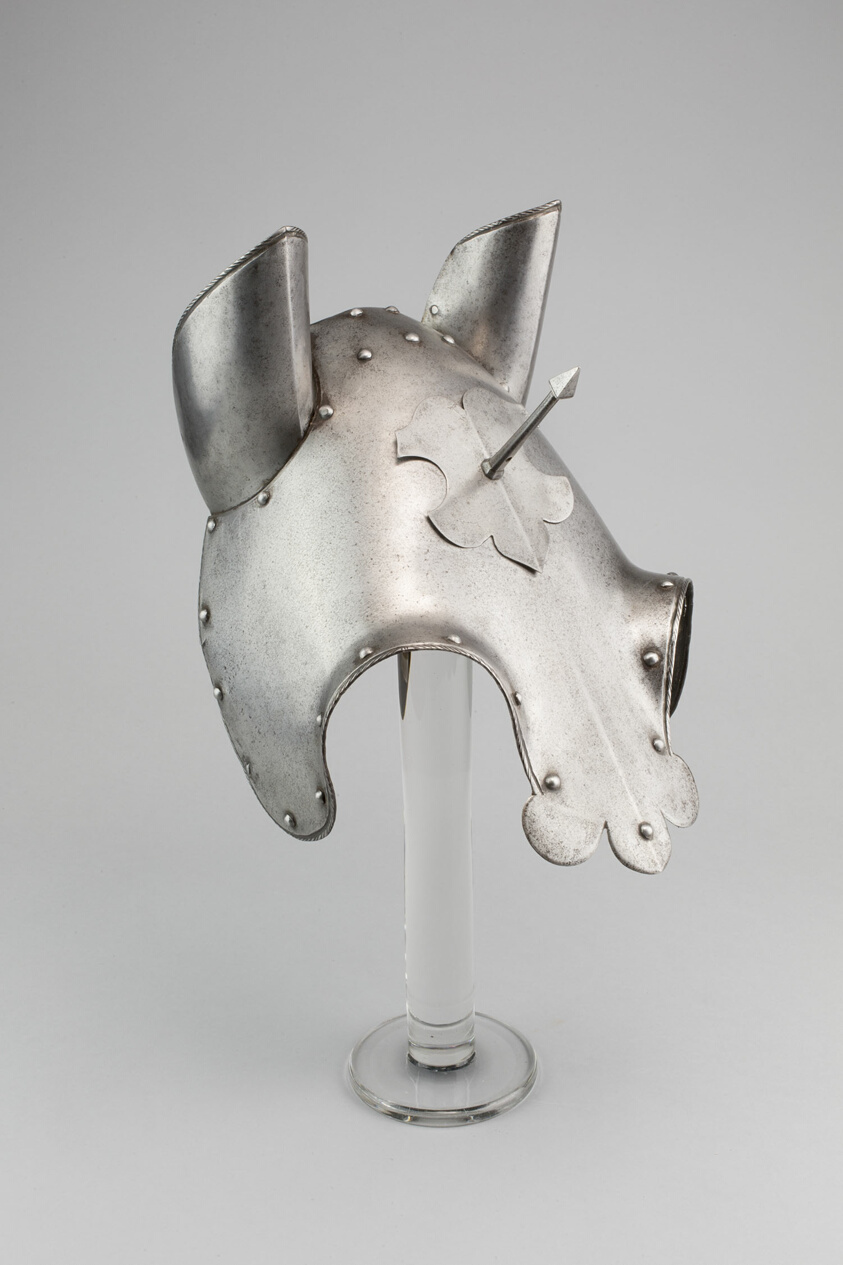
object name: Armor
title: Half-Shaffron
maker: European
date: c. 1560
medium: Steel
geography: Europe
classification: horse equipment; armor; arms and armor